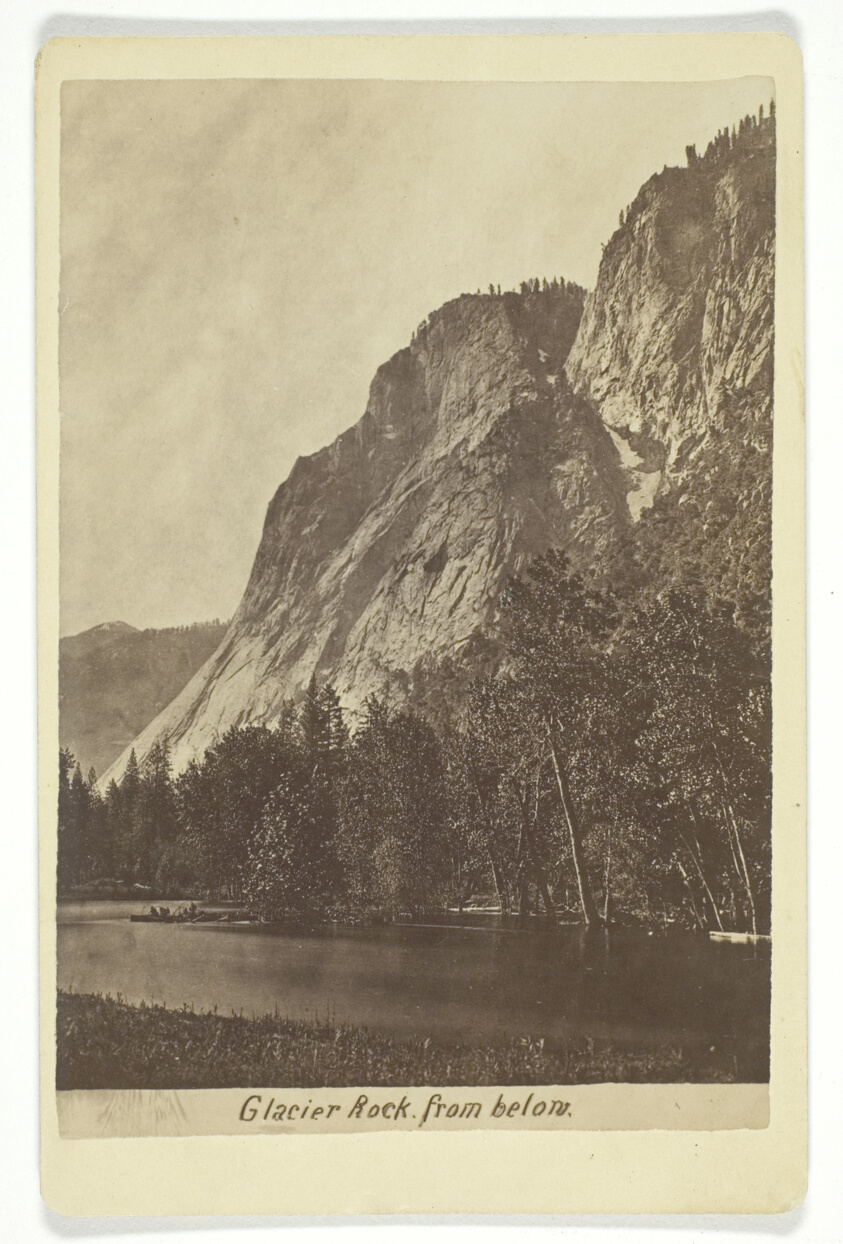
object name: Photograph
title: Glacier Rock from below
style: 19th century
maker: G. Fagersteen (American, 1829–1889)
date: 1866/99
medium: Albumen print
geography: United States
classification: cabinet card (albumen); albumen silver print; photographic process; photography; photograph